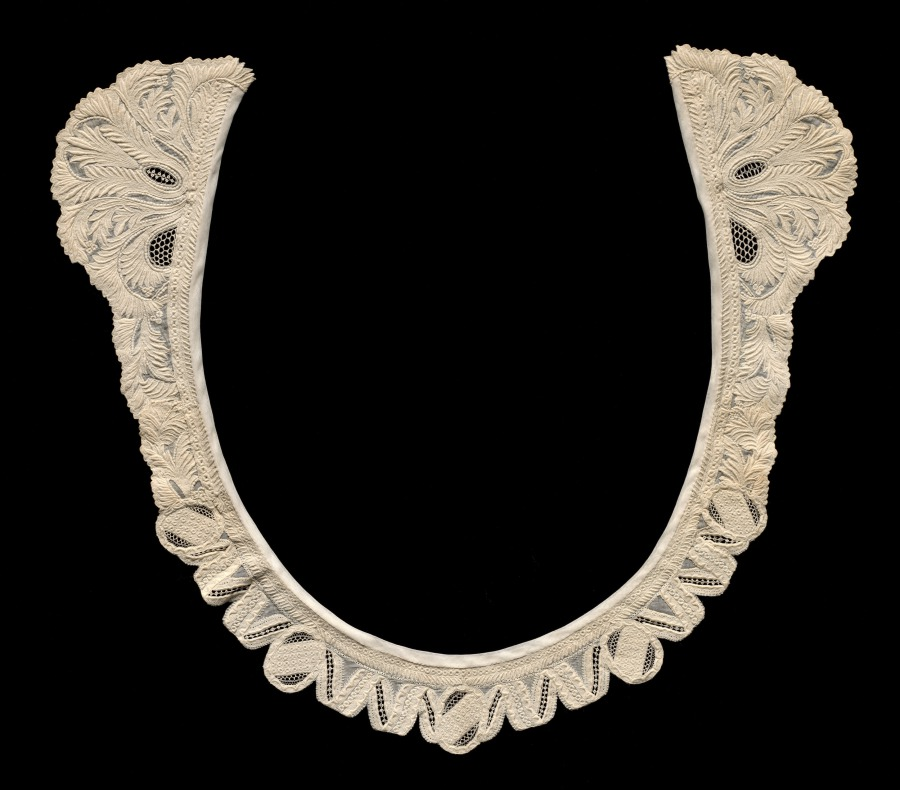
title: Collar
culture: France or Switzerland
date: 1800s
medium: Plain weave linen: cotton embroidery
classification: Embroidery